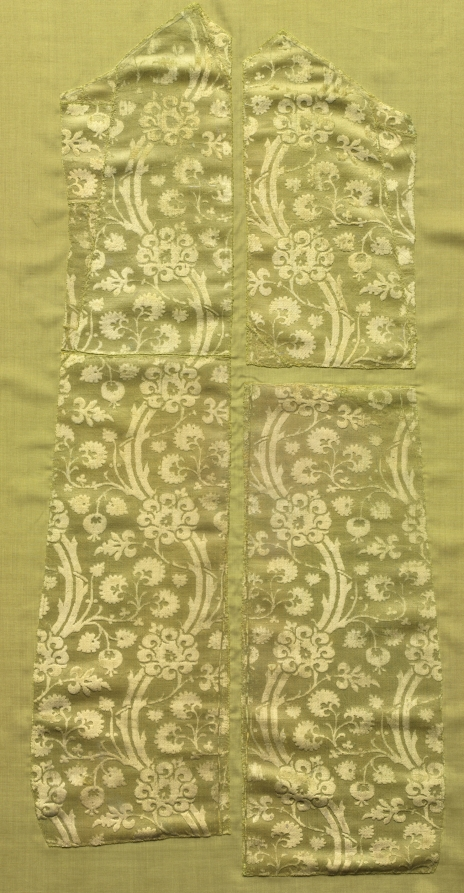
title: Fragment of a Chasuble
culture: Italy, beginning of the 15th century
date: 1400–1420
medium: velvet (cut and voided); silk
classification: Velvet